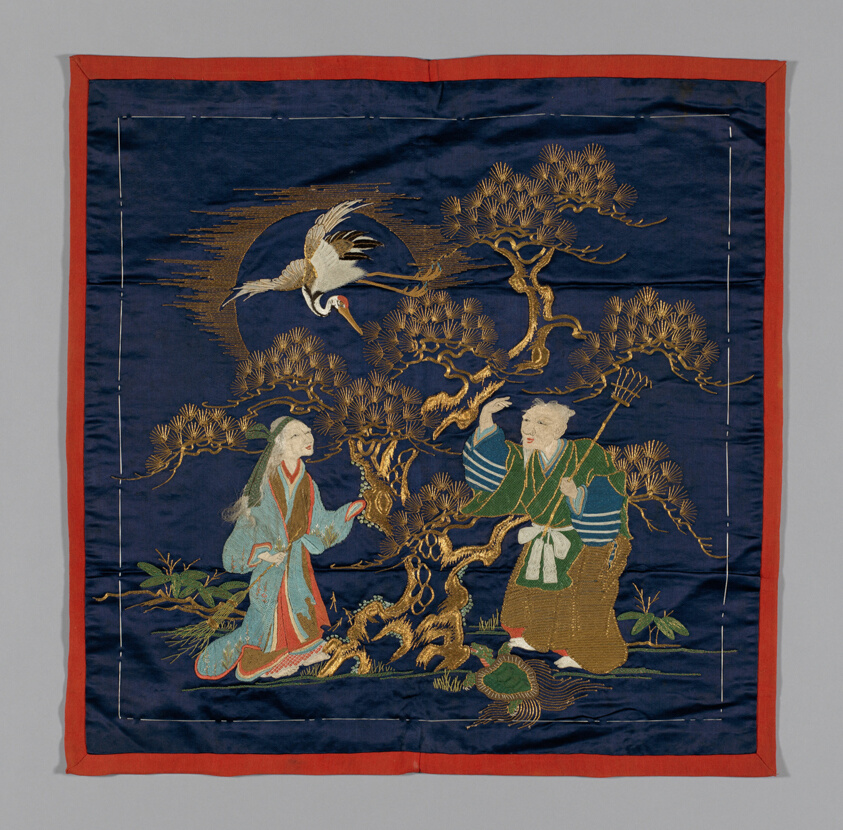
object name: Textile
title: Fukusa (Gift Cover)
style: edo (japanese period), meiji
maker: Japan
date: late Edo period (1789–1868)/ Meiji period (1868–1912), late 19th century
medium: Embroidered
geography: Japan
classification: textile; weaving; liturgical - buddhist